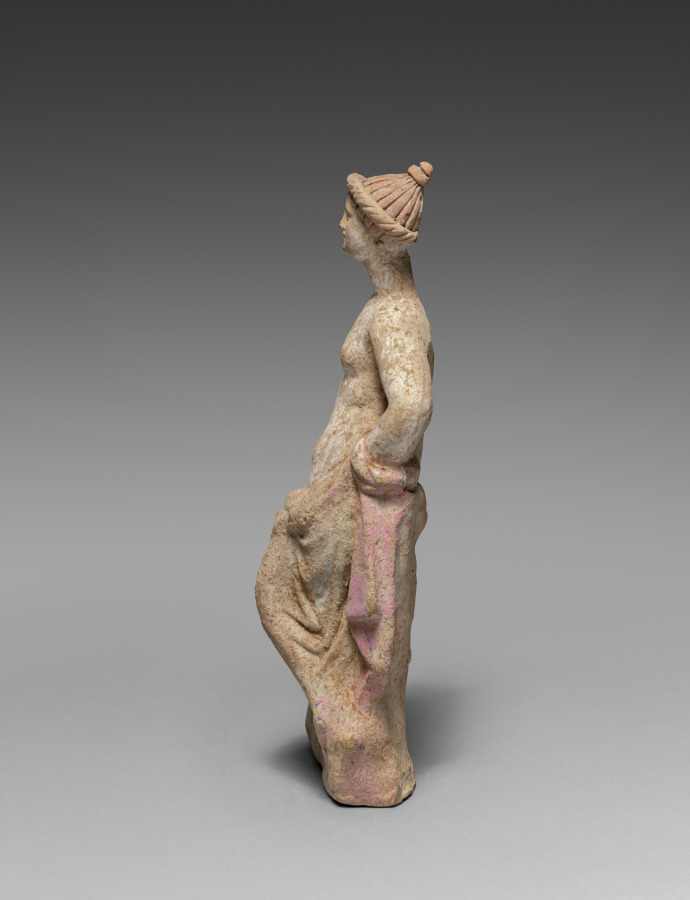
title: Figurine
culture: Greece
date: 300–100 BCE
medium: terracotta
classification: Sculpture